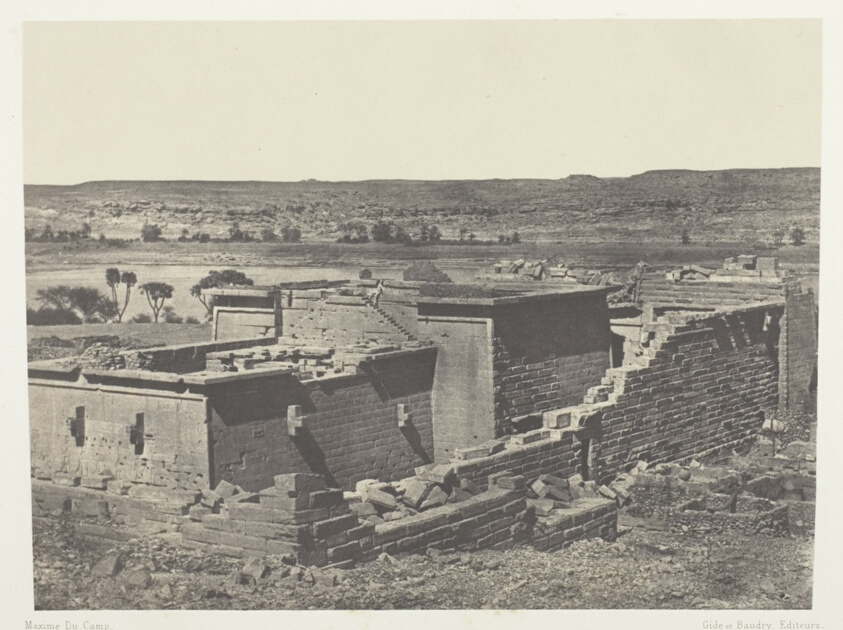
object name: Photograph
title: Kalabscheh, Vue Générale du Temple de Kalabscheh (Talmis); Nubie, plate 89 from the album "Egypte, Nubie, Palestine et Syrie" (1852)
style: 19th century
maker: Maxime Du Camp (French, 1822–1894)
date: 1849/51, printed 1852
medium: Salted paper print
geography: France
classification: salted paper print; photographic process; photography; photograph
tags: Collected by Hugh Edwards, Egypte, Nubie, Palestine et Syrie